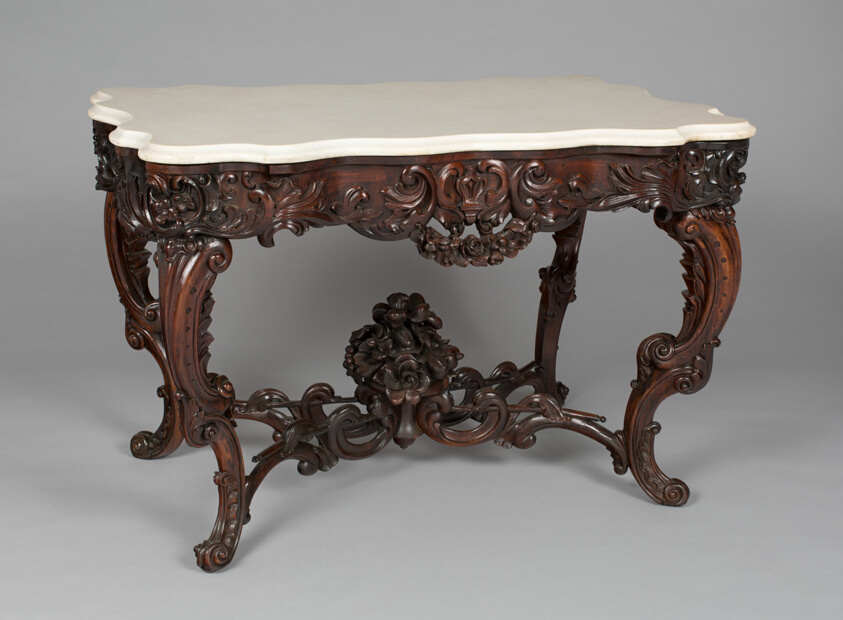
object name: Furniture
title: Table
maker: John Henry Belter & Co.; American, 1854–1867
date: 1856–61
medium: Rosewood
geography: New York City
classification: table; furniture; american decorative arts; american arts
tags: furniture